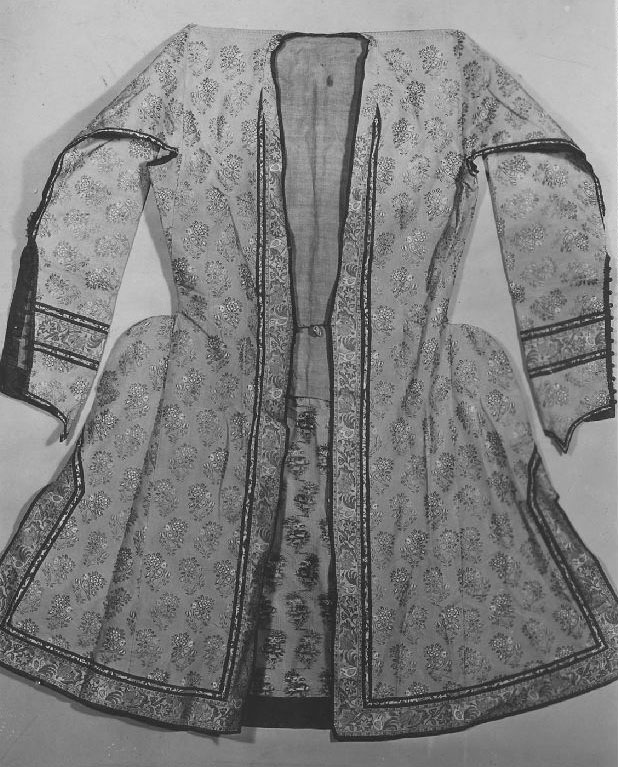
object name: Costume and Accessories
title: Man's Coat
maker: Iran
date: 1775–1825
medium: Silk wound on yellow silk core; brocaded plain cloth; embossed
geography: Iran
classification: clothing; weaving; costume; dress (garment); textile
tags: flowers, roses, hyacinths, bird, roosters